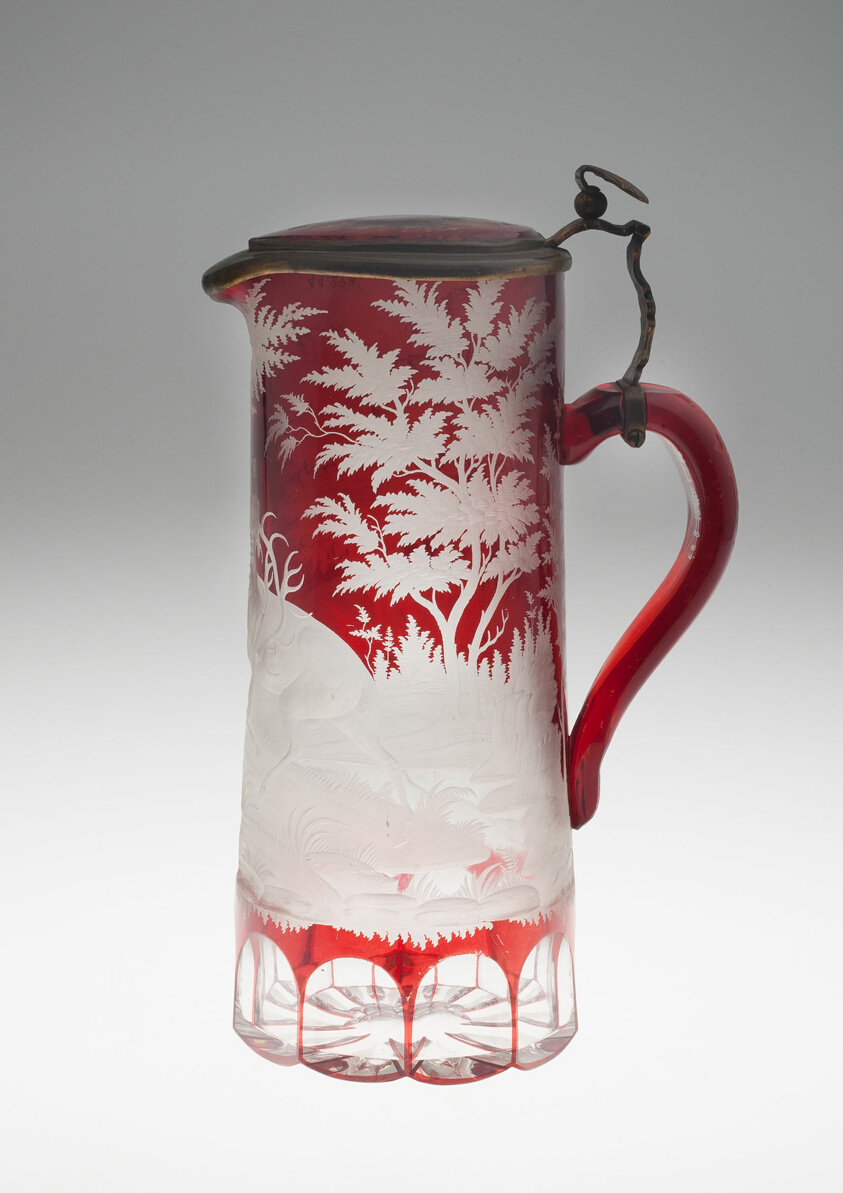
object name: Glass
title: Covered Jug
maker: Bohemia, Czech Republic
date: c. 1840/50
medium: Glass with red flashing and metal mount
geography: Bohemia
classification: glass; european decorative arts